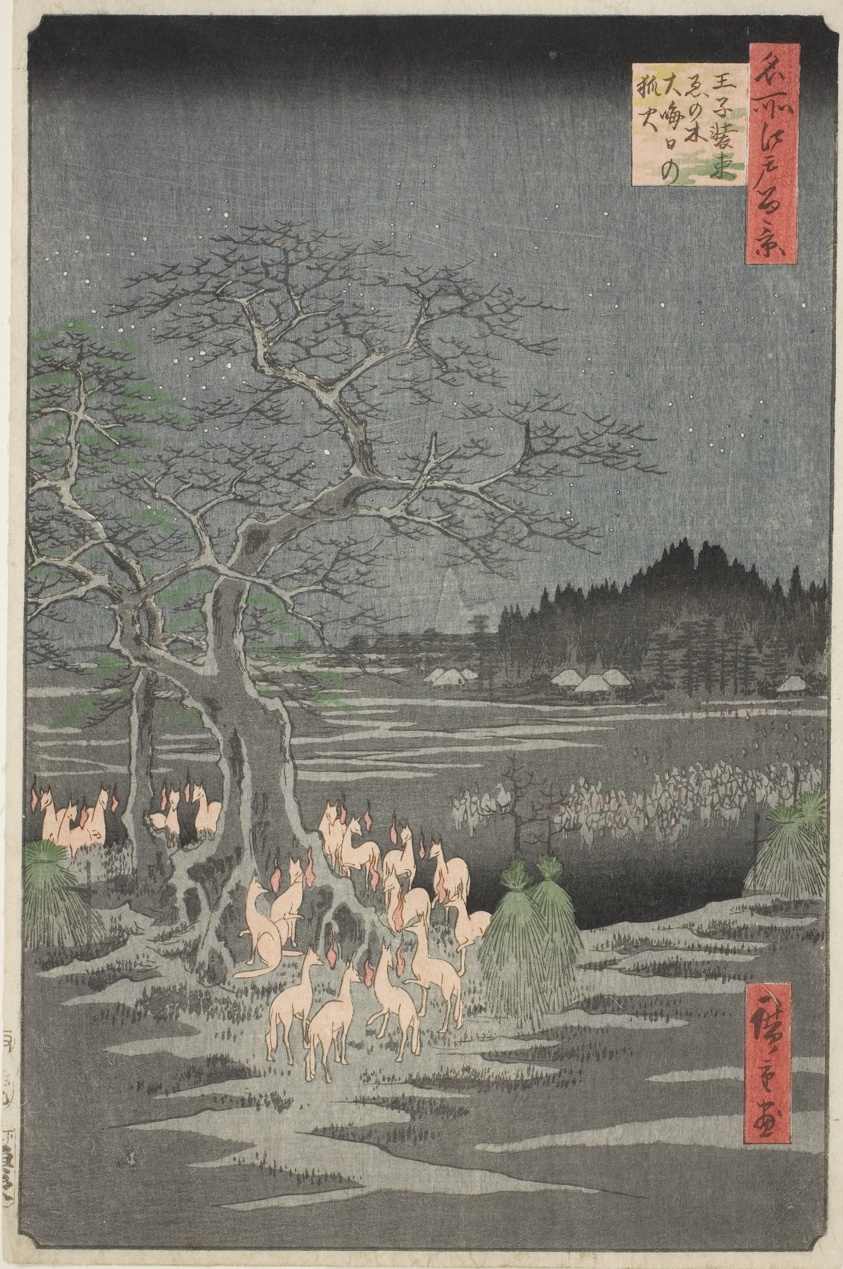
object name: Print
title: Fox Fires on New Year's Eve at the Changing Tree in Oji (Oji shozoku enoki omisoka no kitsunebi), from the series "One Hundred Famous Views of Edo (Meisho Edo hyakkei)"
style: Japanese (culture or style)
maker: Utagawa Hiroshige 歌川 広重; Japanese, 1797-1858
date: 1857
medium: Color woodblock print; oban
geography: Japan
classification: woodblock print; print; asian art